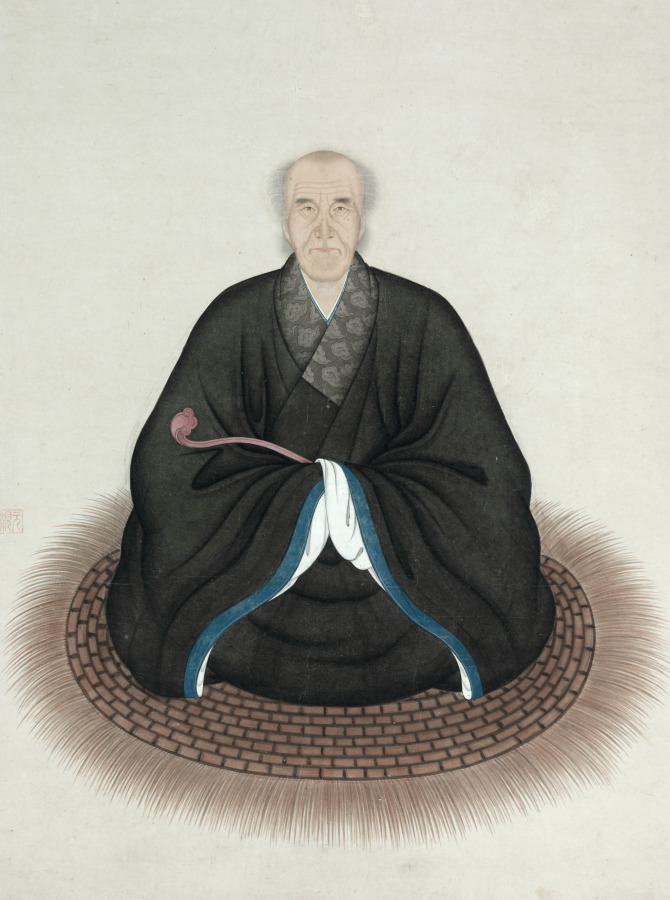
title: Portrait of Duli Xingyi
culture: Japan, Edo period (1615–1868)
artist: Kita Genki (Japanese, active c. 1664–98)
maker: Duli Xingyi (Chinese, 1596–1672)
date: 1671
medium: hanging scroll; ink and color on paper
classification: Painting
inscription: 1671 inscription at top of scroll by Duli Xingyi with three seals, 東矣䪩 (prefatory), 遺世獨立 (top) , 天外一閒人 (bottom); seal of Genki at lower left of painting 元規 .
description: In this portrait, the Ōbaku school Buddhist monk Duli Xingyi (born Tai Li, 1596–1672), whose name is pronounced Dokuryū Shōeki in Japanese, sits upon a woven mat holding a ceremonial scepter known as a ruyi, or nyoi in Japanese. Above his head is an insciption he added to the painting in 1671, the year before his death. It may be translated to read: Contemplative emptiness: the moon suspended over the village at midnight. Suddenly my soul is startled by the howl of an ape. Who could know that it would arouse me beyond my senses, and bring me an inner vision from Mt. Sumeru. (translated by Stephen Addiss and Kwan S. Wong) Originally from what is now the city of Hangzhou in China, Duli emigrated to Japan in 1653, where he took monastic vows. His skills in calligraphy and seal carving were formidable. Painter Kita Genki combined Chinese brush styles he learned in Nagasaki with Western painting techniques to capture Duli's likeness.